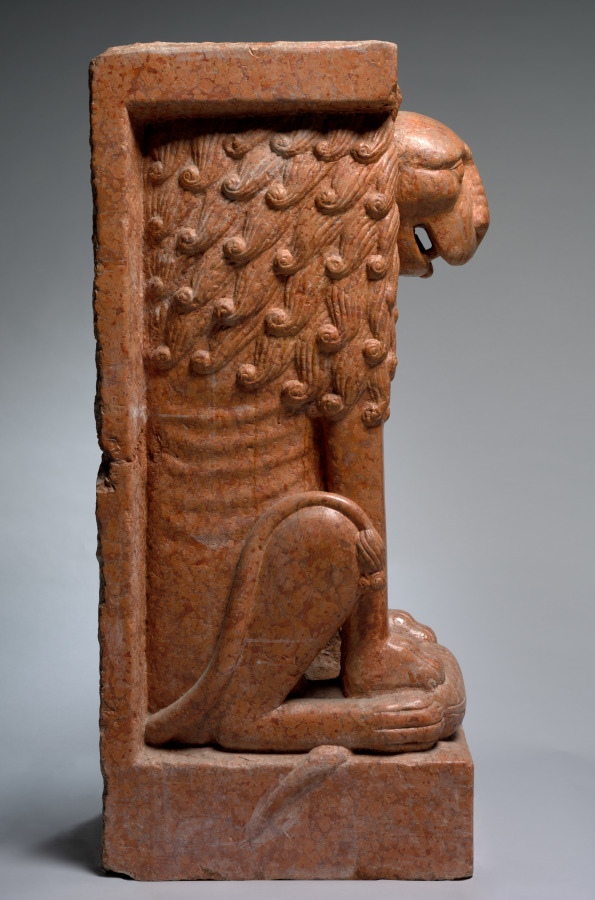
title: Supporting Lion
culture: Italy, style of the 13th century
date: style of the 1200s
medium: pink limestone (known as "Verona Marble")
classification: Sculpture